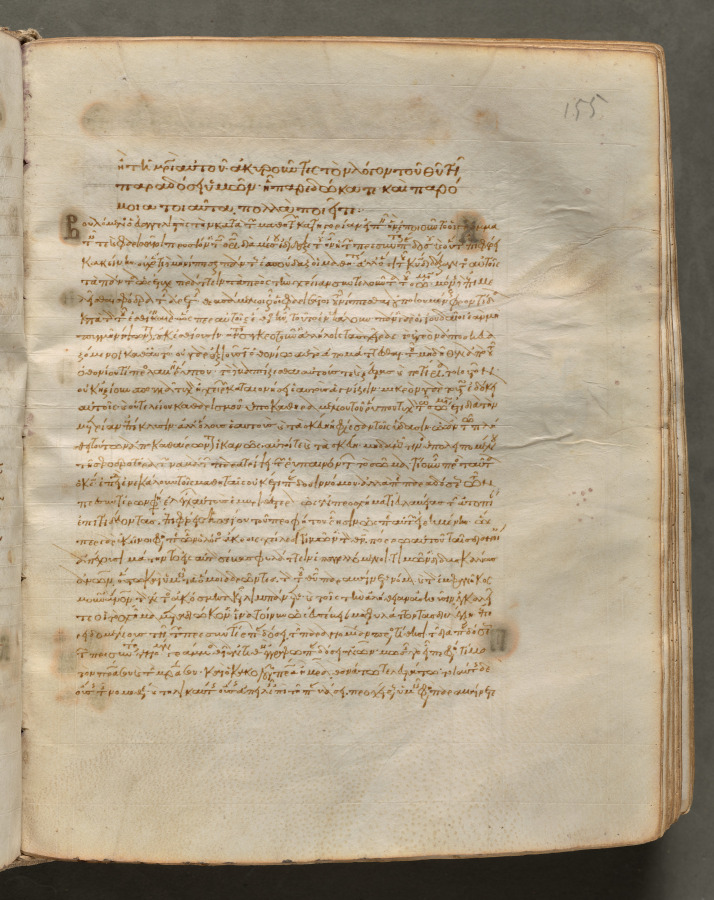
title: Text, folio 155 (recto), from a Gospel Book with Commentaries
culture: Byzantium, Constantinople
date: c. 1000–1100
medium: ink, tempera, and gold on vellum; leather binding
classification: Bound Volume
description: Each of the four gospels in this book opens on a page with brilliantly illuminated borders depicting the author of the text as well as birds-principally peacocks, symbols of the immortality of the soul-and fountains, representing the fountain of life and the salvation of the soul. This volume consists of 428 leaves with texts in Greek. Its level of sophistication suggests that it was probably written and decorated in a monastery in Constantinople.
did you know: Gospel Books were carried in procession through Byzantine churches.